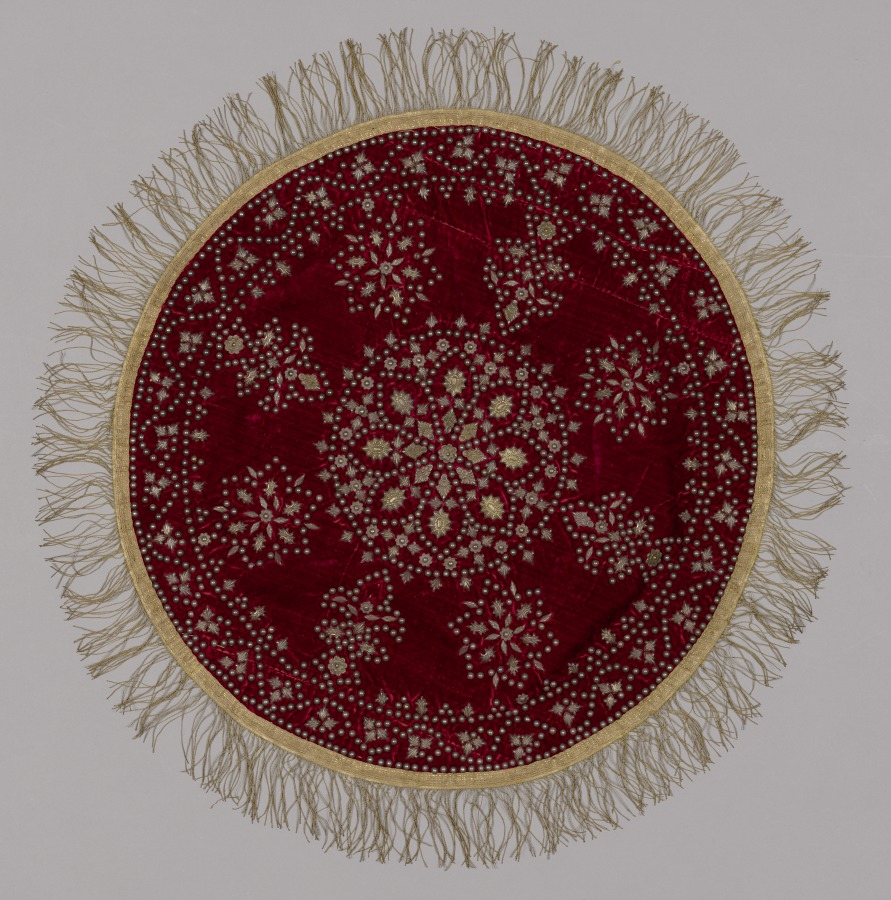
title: Circular Piece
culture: India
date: 1700s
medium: embroidery; velvet decorated with silver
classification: Embroidery